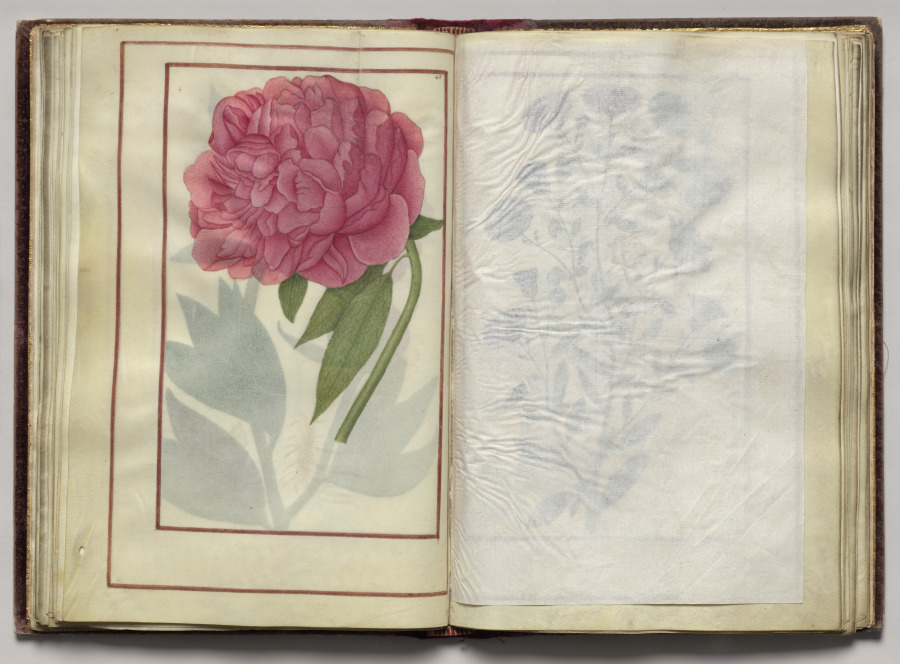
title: Florilegium (A Book of Flower Studies)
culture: France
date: 1608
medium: bound manuscript of 48 leaves, 77 drawings; watercolor, ink, silver, and gold over occasional traces of pencil, on vellum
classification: Bound Volume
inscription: Dated: Poitiers 1608 (on frontispiece) Signed: On frontispiece in black ink, lower right: Van Kuyk Notation on drawing: Frontispiece: in pencil, lower margin: * élève de Van Kessel, peintre flammand (* in pencil also appears in front of Van Kuyk's name).